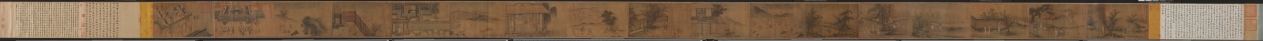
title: "Seventh Month" from the Odes of Bin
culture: China, Southern Song dynasty (1127-1279)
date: 1200s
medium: Handscroll; ink and color on silk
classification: Painting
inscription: Colophons: 1. [on the frontispiece] by the Qianlong emperor (dated 1741). 2. by Lu Wan (dated Zhengde dingchou, 1517). 2. by the Jiaqing emperor (dated 1807).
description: According to Confucian thought, the ruler looks after the well-being of his people which involves agricultural activities. Seventh Month from the ancient Odes of Bin in the Shijing (Book of Poetry) describes occupations throughout the year, including plowing, harvesting, hunting, making clothes, and observing rituals. The earliest illustrations of these Odes accompanied by text were commissioned by Southern Song emperor Gaozong (reigned 1127–1162). As the lower Yangzi delta had become the new seat of government, Gaozong had sets of these illustrations produced by court artists to revive the dynasty and convince the Confucian officialelite of his legitimacy to rule.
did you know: The Odes of Bin appears in the classic Shijing (Book of Poetry), an anthology of more than 300 poems, folk songs, and ceremonial hymns that were originally chanted to music.